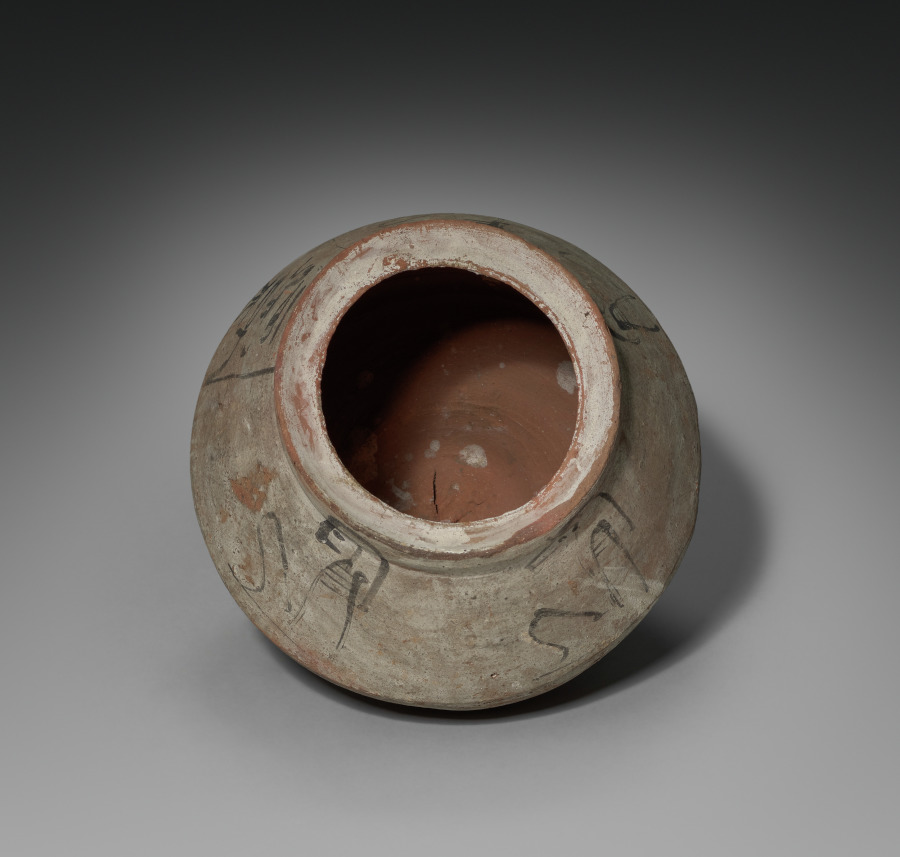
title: Shawabty Jar with Lid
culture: Egypt, New Kingdom (1540–1069 BCE), Dynasties 19–20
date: 1295–1069 BCE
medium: Nile silt ware; lid of limestone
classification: Funerary Equipment